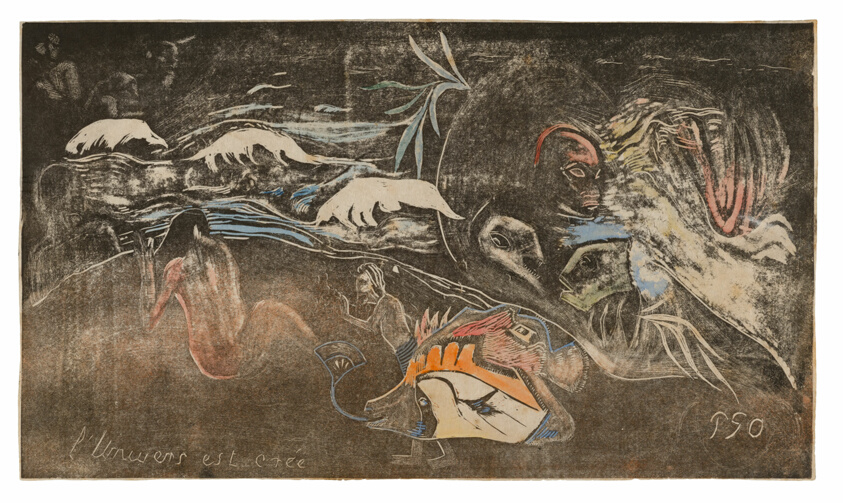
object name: Print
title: L’univers est créé (The Universe Is Being Created), from the Noa Noa Suite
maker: Paul Gauguin (French, 1848-1903)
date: 1893/94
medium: Wood-block print, printed twice in black and brown inks, with selective wiping, and hand-applied orange, yellow, red, two tones of green, two tones of blue, silver-gray and black watercolor, on cream wove Japanese paper laid down on cream laid Japanese paper (a laminate made by the artist)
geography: France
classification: woodcut; print; prints and drawing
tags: mythology